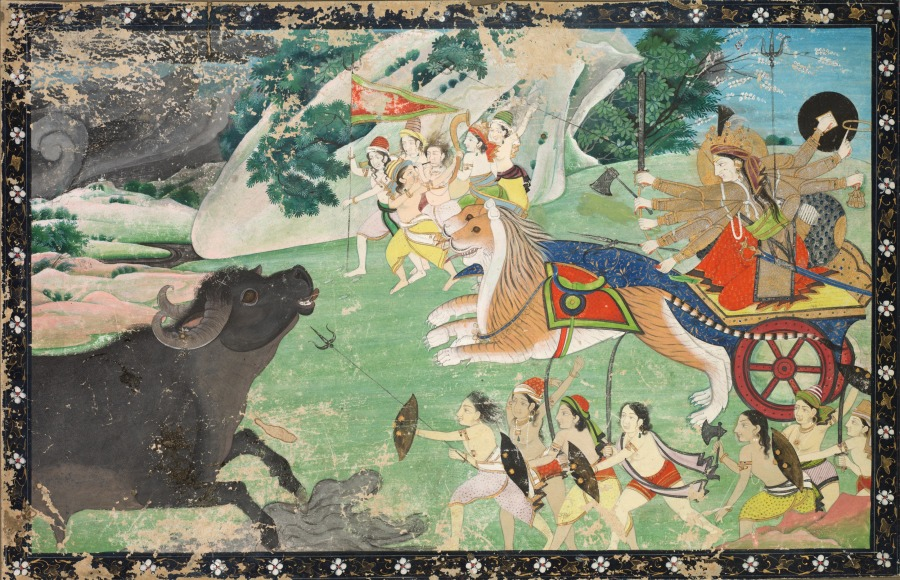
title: Durga Slaying Mahisha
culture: Northern India, Pahari kingdoms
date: c. 1830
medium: Gum tempera and gold on paper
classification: Painting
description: According to the text dedicated to the exploits of the great goddess Devi in her various forms, there was a time in the mythic past when a buffalo demon was ravaging the world. Storm clouds swirl above and dust below him. The goddess in her warrior aspect in which she is named Durga rides a chariot pulled by two leonine tigers with blue skies and flowering trees above her. The two are about to clash in a bloody battle that will take place on the gently sloping hillside evocative of the western Himalayan foothills where this painting was made.